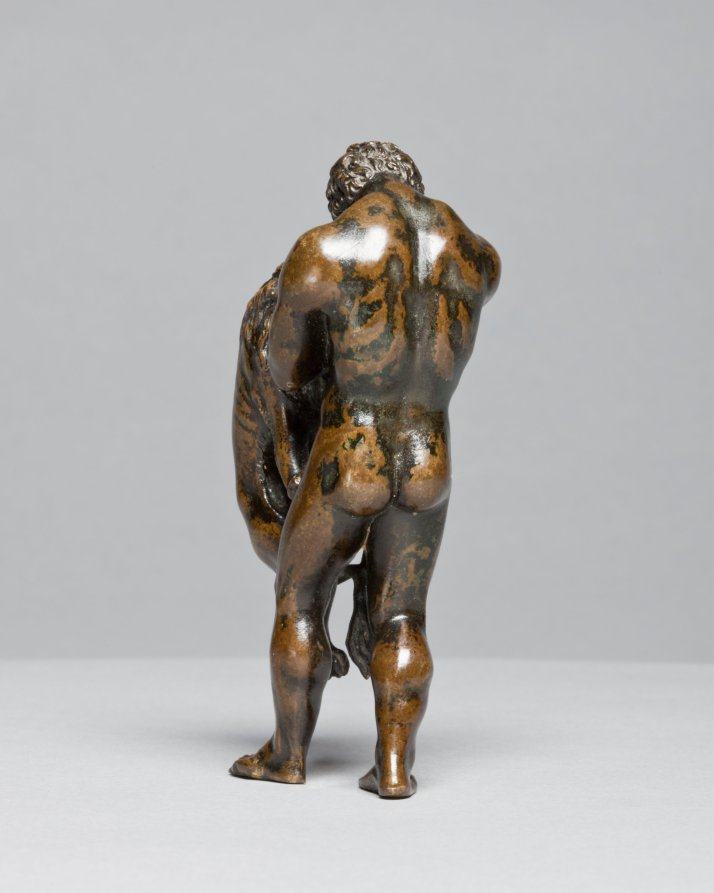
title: Hercules and the Nemean Lion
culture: Italy or France, 16th century or later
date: 1500s or later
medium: bronze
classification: Sculpture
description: The original owner of this work would have understood that this scene referred to the entire story of Hercules, the demi-god who had to accomplish twelve labors. The lion is named after the city of Nemea, near Corinth, a monstrous beast sent by the goddess Hera to wreak havoc on the area. After killing the lion, Hercules wore his pelt, commonly seen in other representations of the hero.